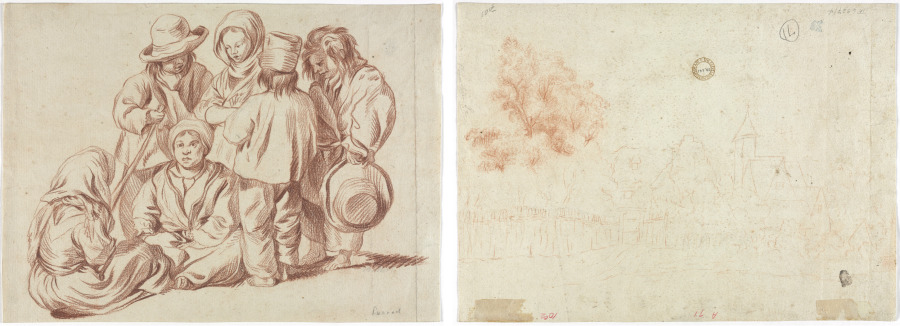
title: Group of Six Children (recto); Sketch of a Village (verso)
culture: France, 18th century (?)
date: 1700s(?)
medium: red crayon over traces of black chalk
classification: Drawing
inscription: lower right, in graphite: Du[illegible]